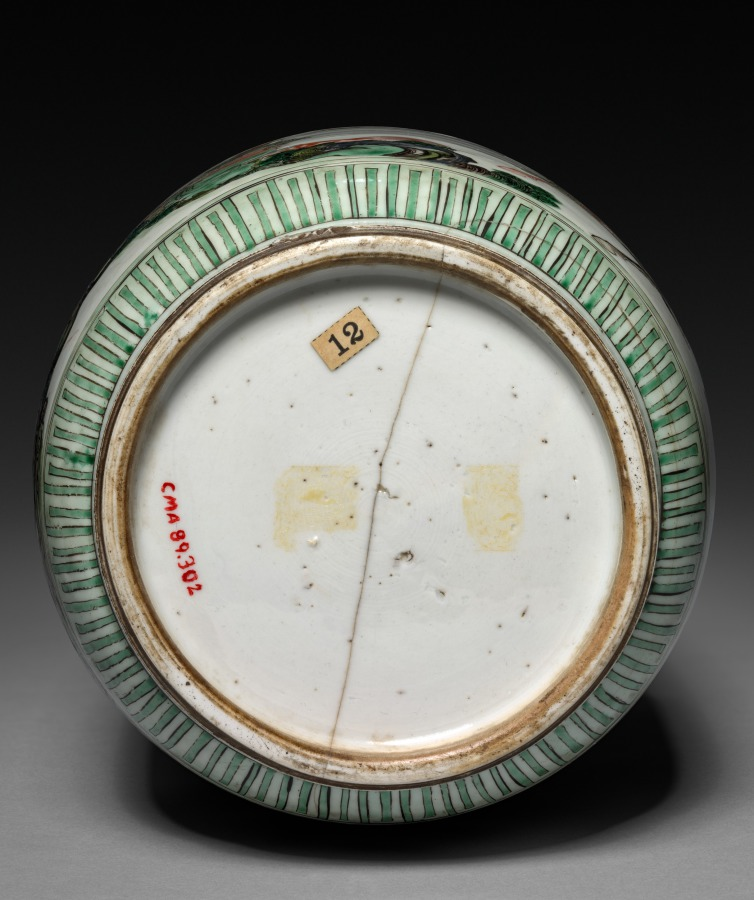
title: Vase with Decoration of Figures in Chariots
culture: China, Qing dynasty (1644-1911), Kangxi reign (1662-1722)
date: 1622–1722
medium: porcelain with famille verte overglaze enamel decoration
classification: Ceramic